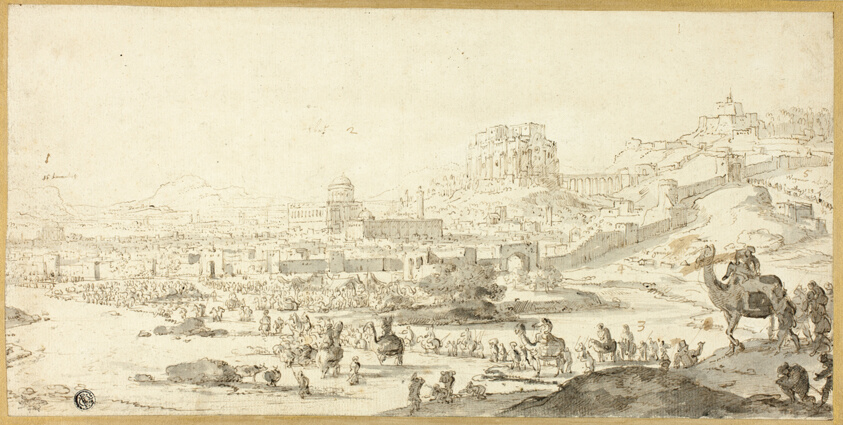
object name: Drawing and Watercolor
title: Hur in Chaldea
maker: Jan Peeters, I (Flemish, 1624-c. 1677)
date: c. 1665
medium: Pen and brown ink with brush and black ink wash, over traces of black chalk on ivory laid paper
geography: Flanders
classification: ink or chalk wash; drawings (visual works); prints and drawing